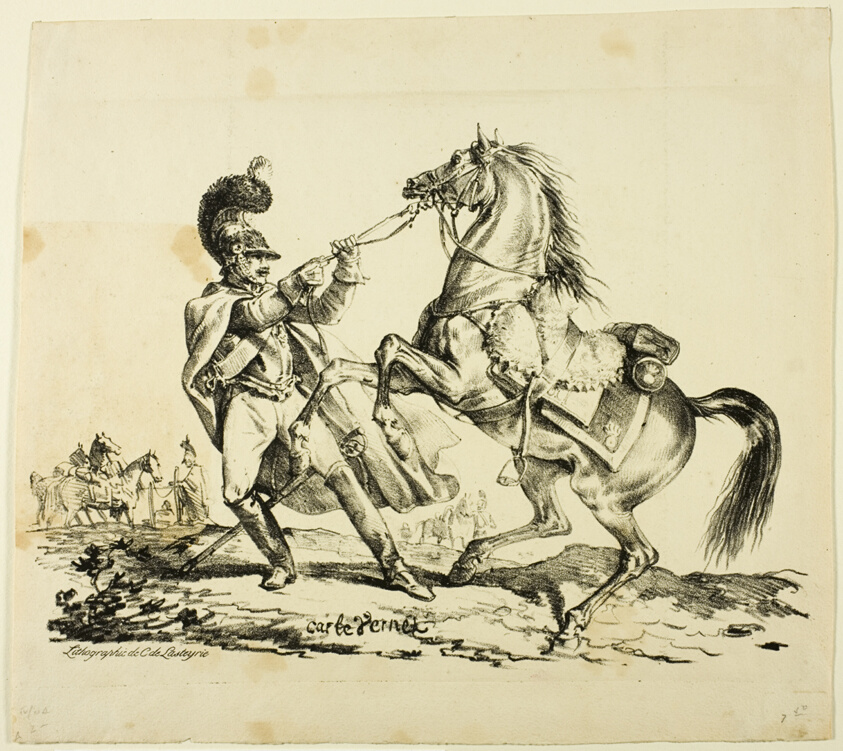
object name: Print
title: Cuirassier on Foot Restraining His Rearing Horse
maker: Carle Vernet (French, 1758-1836); printed by Comte Charles Philibert De Lasteyrie (French, 1759-1849)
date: 1817–36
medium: Lithograph in black on cream wove paper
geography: France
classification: lithograph; print; prints and drawing